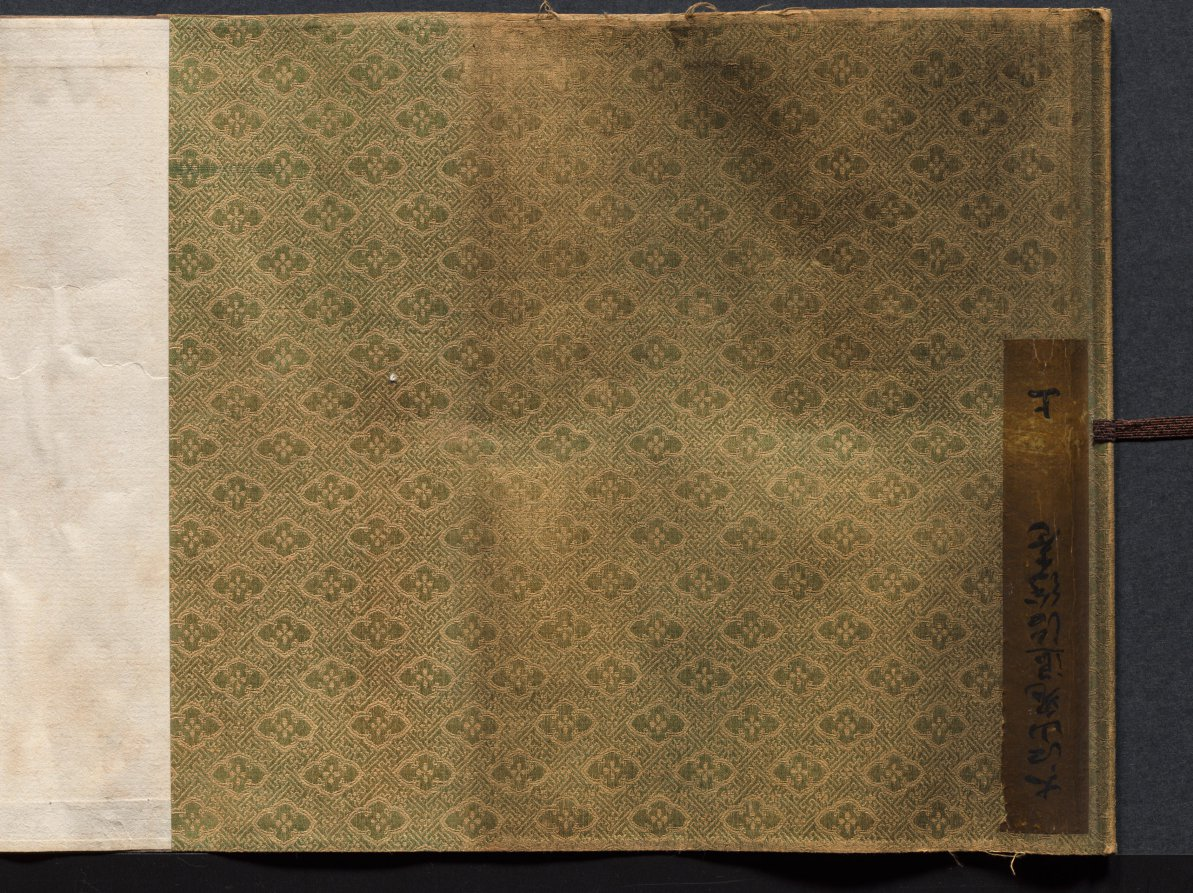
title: Oeyama Engi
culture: Japan, Edo period (1615–1868)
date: 1615–1868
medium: one of a pair of handscrolls; ink and color on paper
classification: Painting